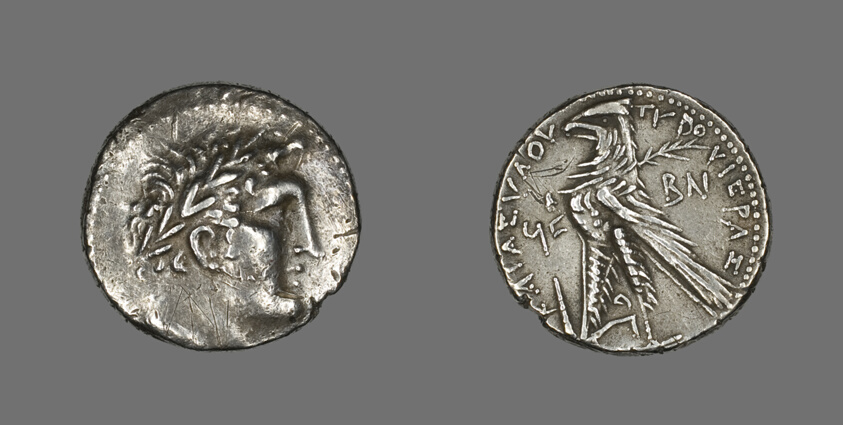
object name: Coin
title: Shekel (Coin) Depicting the God Melkarth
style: phoenician, ancient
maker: Phoenician, minted in Tyre, Syria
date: 31-30 BCE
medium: Silver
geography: Tyre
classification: coin; ancient art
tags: deities, mythological figures